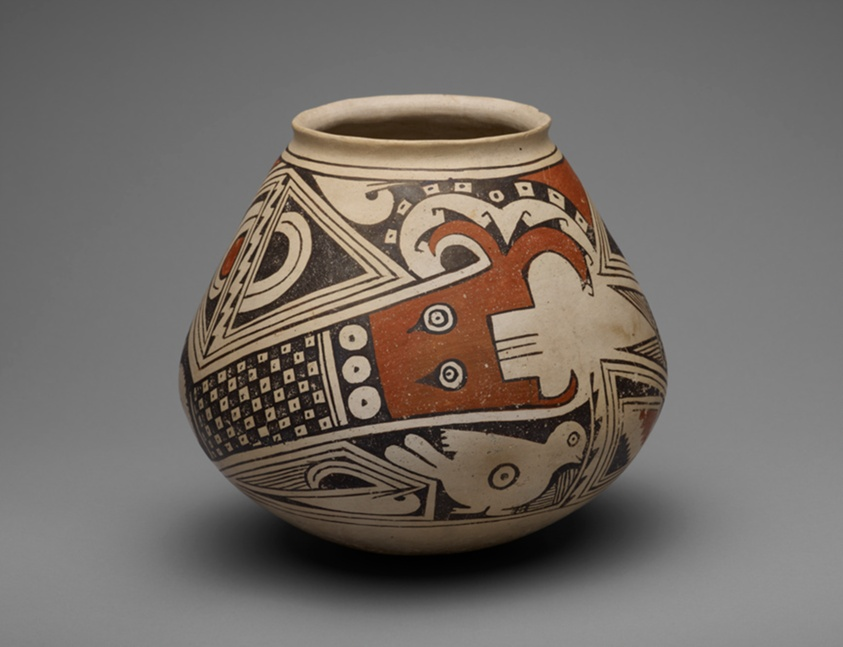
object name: Vessel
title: Jar with Two Plumed or Horned Serpents with Birds and P-shaped Motifs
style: casas grandes, southwest, americas, native american, native north american, Arts of the Americas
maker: Casas Grandes, Ramos Polychrome; New Mexico, United States, or Chihuahua, Mexico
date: 1280–1450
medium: Ceramic and pigment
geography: New Mexico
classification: vessel; ceramics; art of the americas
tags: supernatural, animals, birds, checkerboards, Macaw, serpents, composite, abstract figures